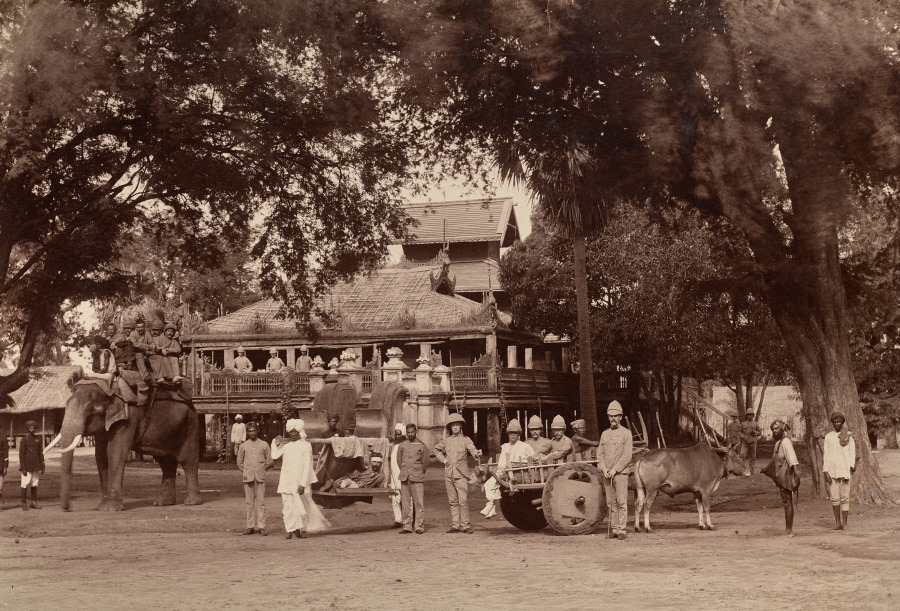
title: Untitled (British soldiers, man on palequin, and indgenous workers, recto)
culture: England, 19th century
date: 1870s-1880s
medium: albumen print mounted on an album page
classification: Photograph